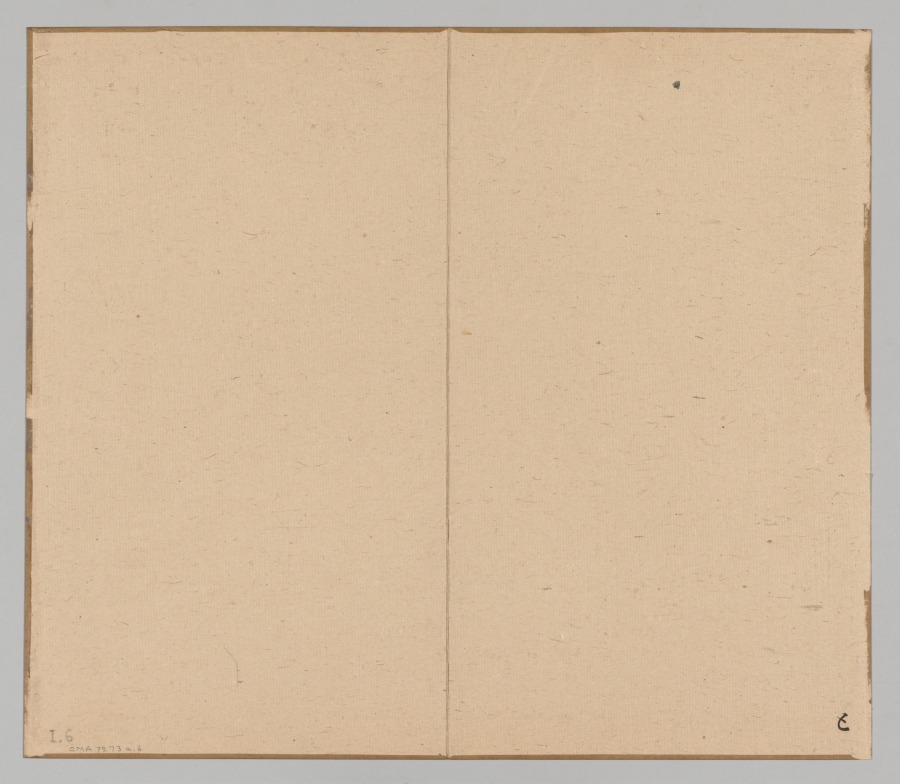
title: Reverberations of Taiga, Volume 1 (leaf 6)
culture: Japan, Edo period (1615–1868)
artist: Aoki Shukuya (Japanese, d. 1802)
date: mid- to late 1700s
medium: double-leaf from a pair of albums; ink and light color on paper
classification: Portfolio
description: Traditionally, young painters in Japan began their studies with an established master-painter. The master's compositions invariably became models that the apprentice copied to learn various ink and brush techniques. Shukuya was a pupil of the famous Kyoto artist Ikeno Taiga, whose style is reflected in these sketches of rocks, trees, and mountains.